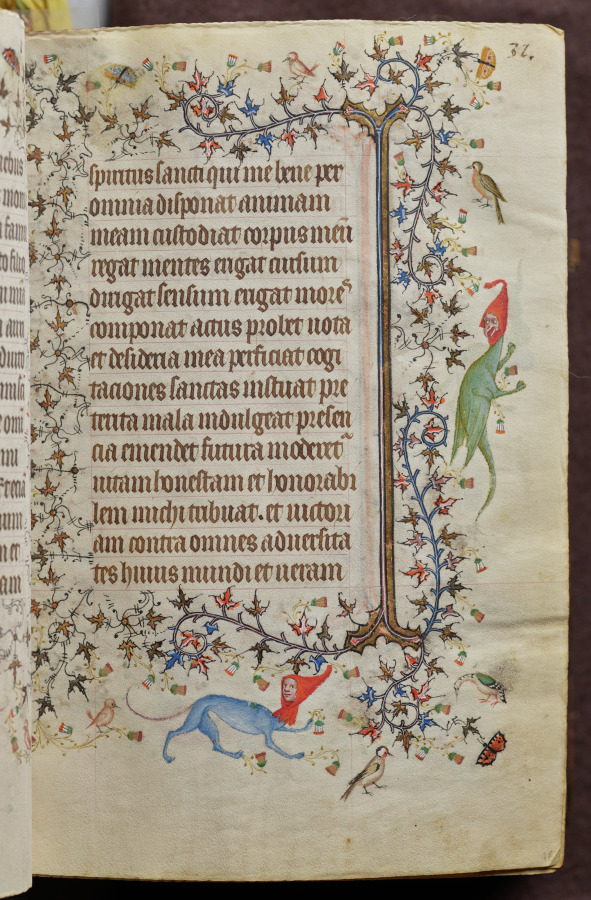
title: Hours of Charles the Noble, King of Navarre (1361-1425): fol. 16r, Text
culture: France, Paris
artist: Master of the Brussels Initials and Associates (French)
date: c. 1405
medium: ink, tempera, and gold on vellum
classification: Bound Volume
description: This precious volume was obviously highly prized by its owner, the French-born King of Navarre, who had his coat of arms painted on no less than twenty folios. Rather than directly commissioning this manuscript from a specific workshop, it seems that Charles the Noble acquired his book of hours -- perhaps ready-made for the luxury market -- while on a trip to Paris in 1404-05. A collaborative effort, six painting styles are evidenced within the pages of this codex, those of two Italians, two Frenchmen, and two Netherlanders. The painter who was responsible for the planning and decoration of the book, and who produced seventeen of the large miniatures, was a Bolognese artist known as the Master of the Brussels Initials. His principal assistant, responsible for most of the borders, was a Florentine who signed his name "Zecho" da Firenze on folio 208 verso.